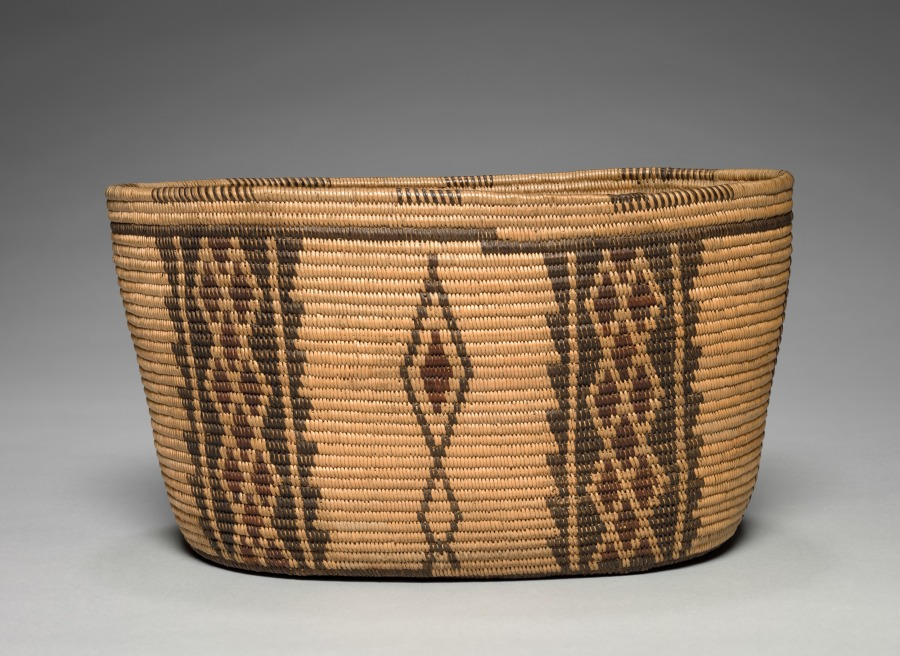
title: Bowl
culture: Great Basin, Timbisha Shoshone (Panamint)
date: c 1900–1910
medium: willow, devil's claw, yucca root; coiled (3 rods)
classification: Basketry